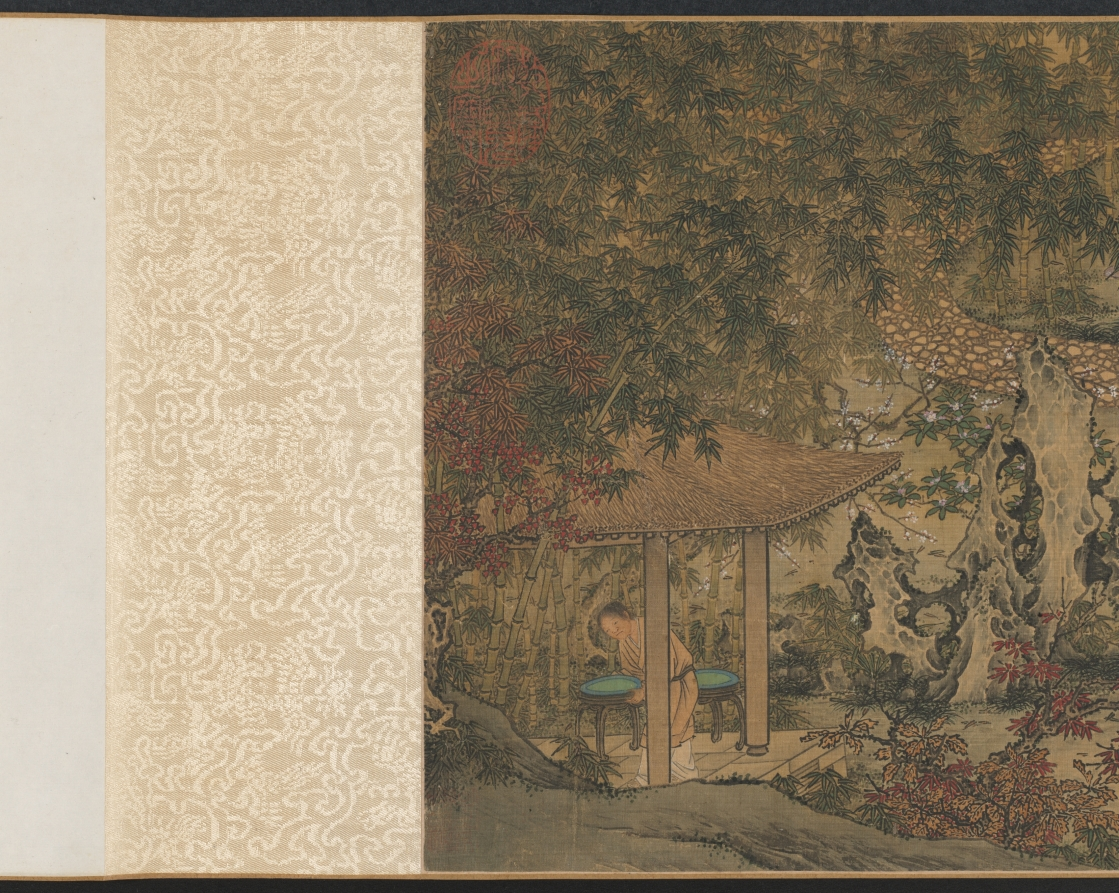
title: The Nine Elders of the Mountain of Fragrance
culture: China, Ming dynasty (1368–1644)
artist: attributed to Xie Huan (Chinese, c. 1370-c.1450)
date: 1426–52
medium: handscroll, ink and color on silk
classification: Painting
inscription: 4 seals: 2 of Xiang Yuanbian 項元汴 (1525–1590); 1 of the Qianlong Emperor (r. 1736-95); 1 of C. C. Wang 王季遷 (1907–2003)